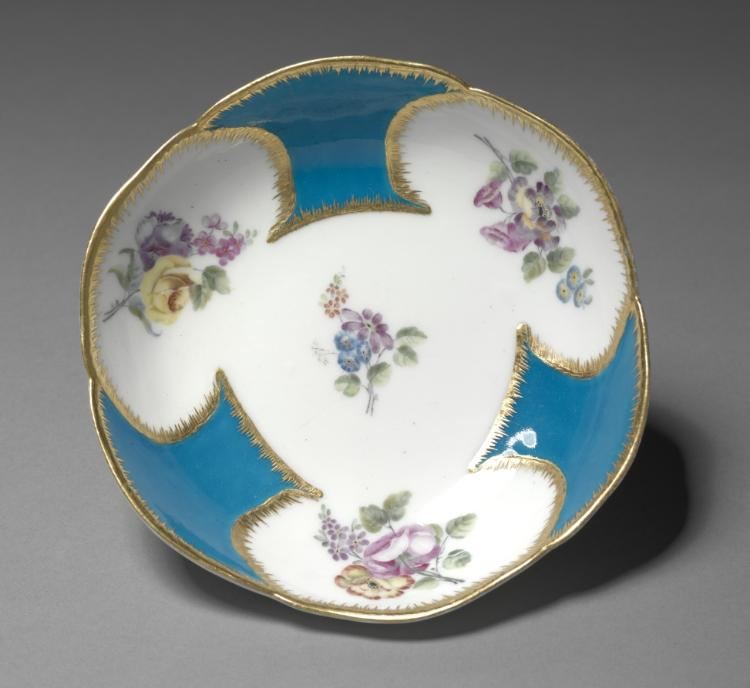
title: Saucer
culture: France, Sèvres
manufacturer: Sèvres Porcelain Factory (French, est. 1756)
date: 1758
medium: soft-paste porcelain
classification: Ceramic